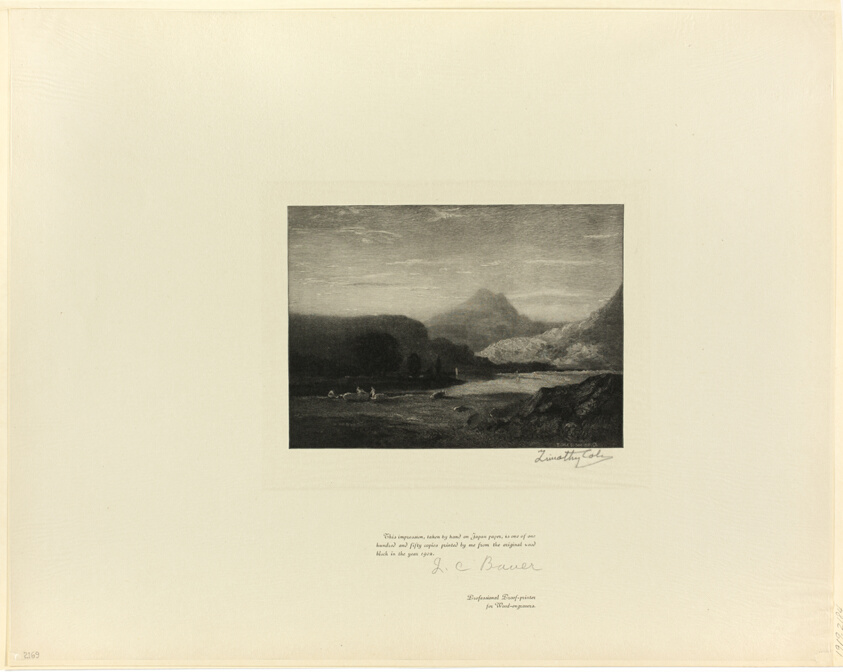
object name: Print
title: On the River Wye, from Old English Masters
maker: Timothy Cole (American, born England, 1852-1931); after Richard Wilson (English 1714- 1782)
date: 1898, printed 1902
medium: Wood engraving on chine paper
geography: United States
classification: wood engraving; print; prints and drawing